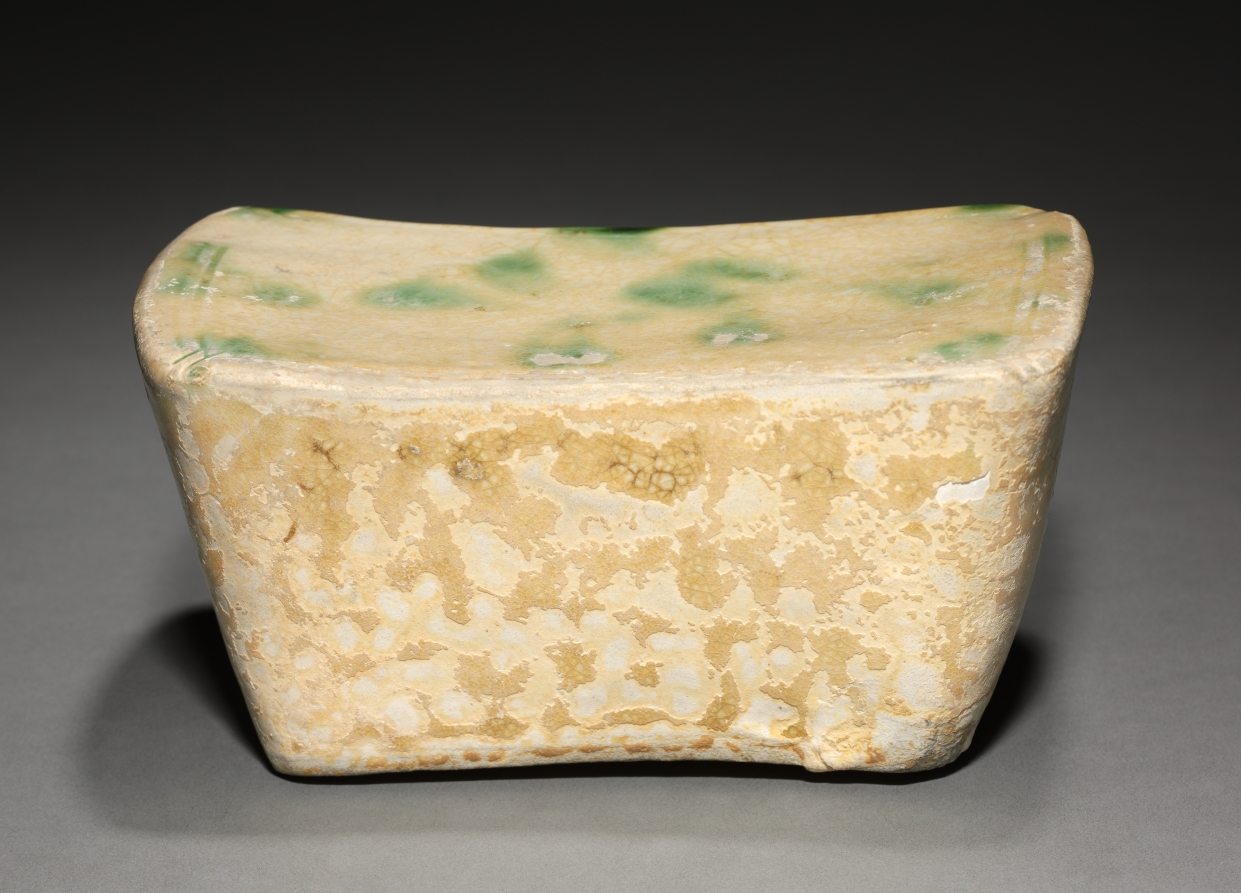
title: Pillow: Wazhaping ware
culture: China, Hunan province, Changsha, Five dynasties (907-960)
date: 906–960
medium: glazed stoneware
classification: Ceramic